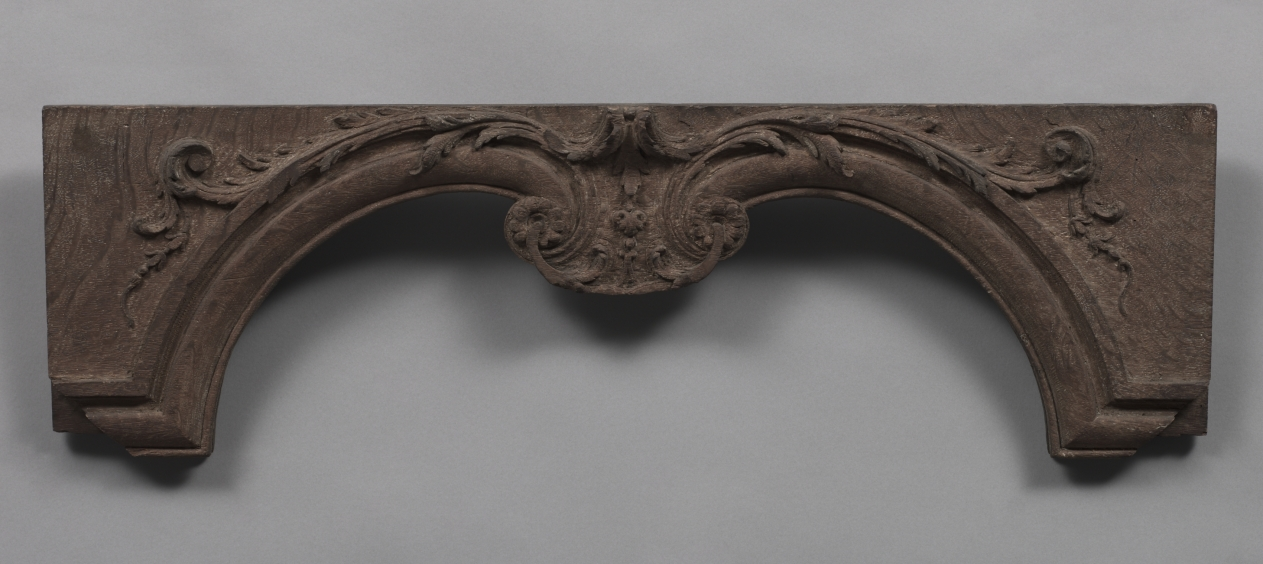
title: Panel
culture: France, Regency Period, 18th Century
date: 1715–1723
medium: wood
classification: Furniture and woodwork